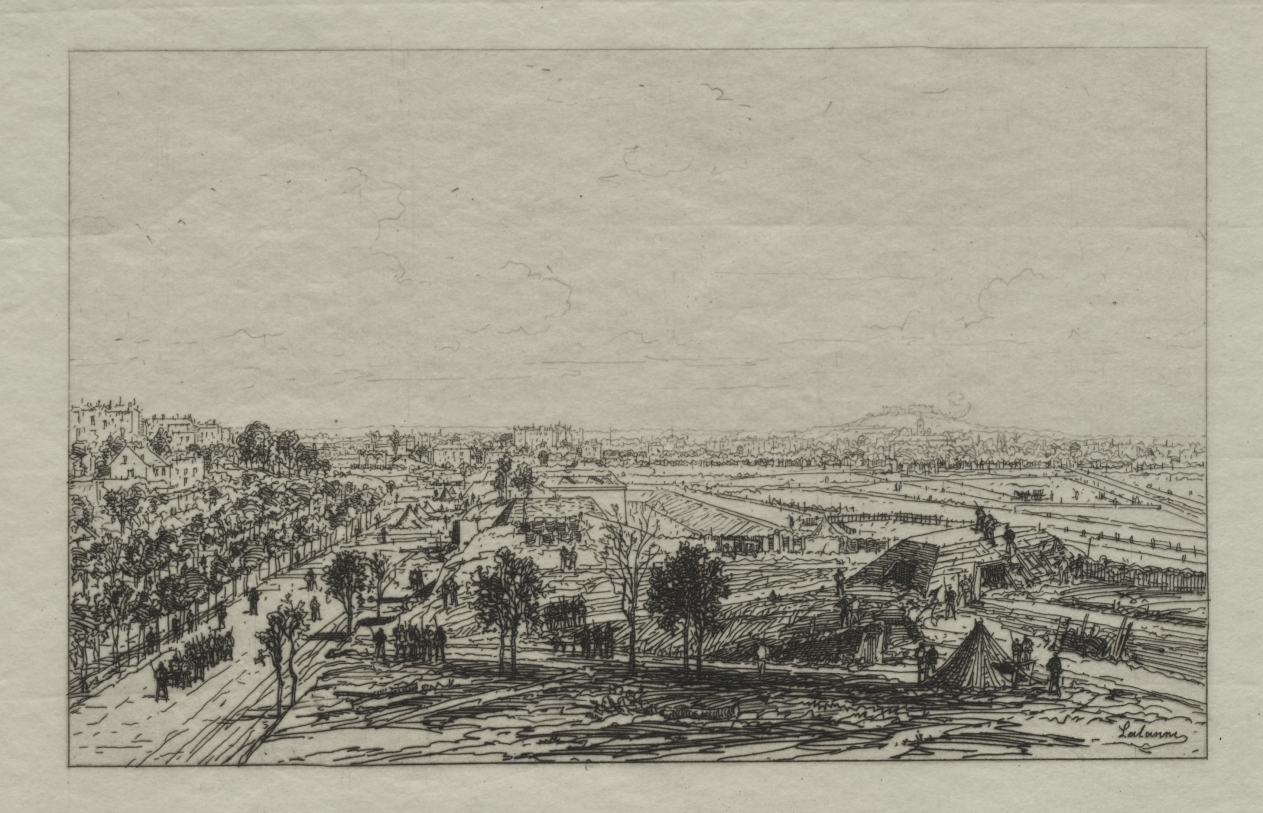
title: Bastion 49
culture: France, 19th century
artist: Maxime Lalanne (French, 1827–1886)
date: 1870–71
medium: etching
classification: Print